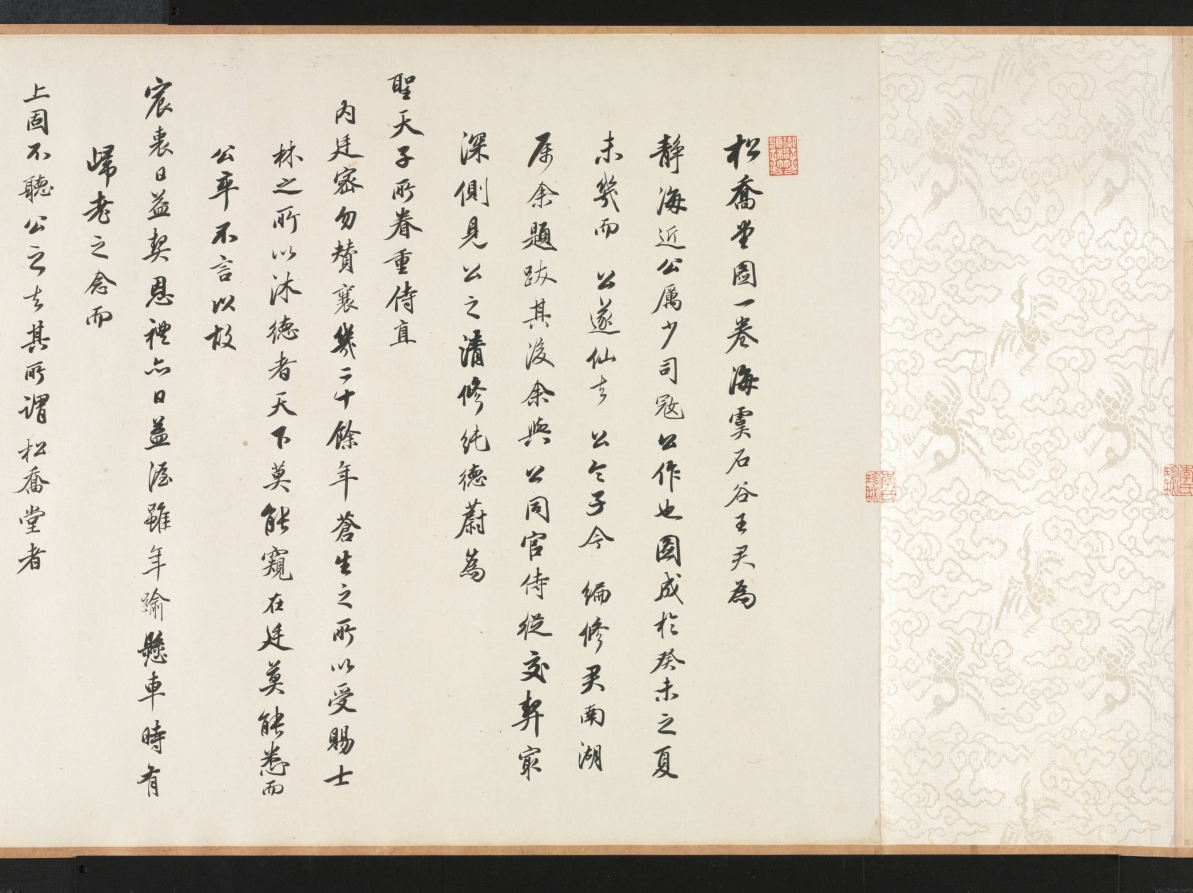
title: Hall of Lofty Pines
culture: China, Qing dynasty (1644-1911)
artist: Wang Hui (Chinese, 1632–1717)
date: 1703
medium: handscroll; ink and color on paper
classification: Painting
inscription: [題] 松喬堂圖 康熙癸未夏六月, 海虞耕煙散人王翬畫。[印]王翬之印; 石谷. [左下] 來青閣; 耕煙野老時年七十有二.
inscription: 松喬堂圖一卷，海虞石谷王君為靜海近公厲少司冦公作也。圖成于癸未之夏。未幾而公遂仙去。公令子今編修君南湖屬余題跋其後。余與公同官侍從，交契最深。側見公之清修純德，蔚為聖天子所眷重。侍直內廷，密勿贊襄，幾二十餘年。蒼生之所以受賜，士林之所以沐德者，天下莫能窺，在廷莫能悉。而公卒不言。以故宸衷日益契，恩禮亦日益渥。雖年逾懸車，時有歸老之念。而上固不聼公之去。其所謂松喬堂者，御書以賜公者也。蓋以松比公之清風勁節，而歲寒不改，經霜彌茂。則又以期公之壽考未有艾焉。公知此身未易乞，而山林槃磵之樂，止可寄諸寤思。此松喬堂圖之所由作也歟。石谷此圖，結構精密，筆墨超邁。其寫樹木之蒼蔚，堂宇之靚幽。恍見摩詰輞川樂天廬山之勝。獨惜公未得一日徜徉故園以償其願。即繪於圖亦未得以永其趣，此編修君之所以眷眷不忘也。雖然千歳之松喬，下蔭百畝，上以修棟梁之需。然則上當日名堂之意，不更望於後之人襲其芘而養其材也哉。吾願編修君之寶斯圖。并望君之塗塈丹雘，大其堂構也已矣。 康熈丙戍重陽三日，雲間王鴻緒跋。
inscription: 10 additional seals: 1 seal of Li Duna 勵杜納 (1628–1703); 4 seals of Zha Ying 查瑩 (jinshi of 1766); 5 seals of Li Yun (dates unknown).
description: Wang Hui 王翬, a leading painter in the orthodox school of the early Qing dynasty (1644–1911), was commissioned to paint this landscape with a country estate for Li Duna 勵杜納 (1628–1703), vice minister of justice in Emperor Kangxi’s court. The emperor had honored Li by granting him a piece of calligraphy with the name of Li’s retirement retreat, “Hall of Lofty Pines.” He drew a comparison between pines and Li’s upright character, resilience, and longevity. Wang Hui’s painting was supposed to allow Li to imagine living in a beautiful, secluded compound among the hills and pines. Sadly, Li died before seeing the completed painting and before receiving the emperor’s permission to retire. The landscape begins with peaceful riverbanks and low hills. The pines around the estate in the middle of the handscroll are truly lofty, some stretching even beyond the frame of the painting. Li Duna, the estate’s owner, is shown twice in his serene mountain retreat: first approaching the entrance to the compound with two servants at the right, and then later in the scroll, to the left, reading in the comfort of an inner room.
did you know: One servant carries the estate owner's carefully wrapped qin, a type of zither.